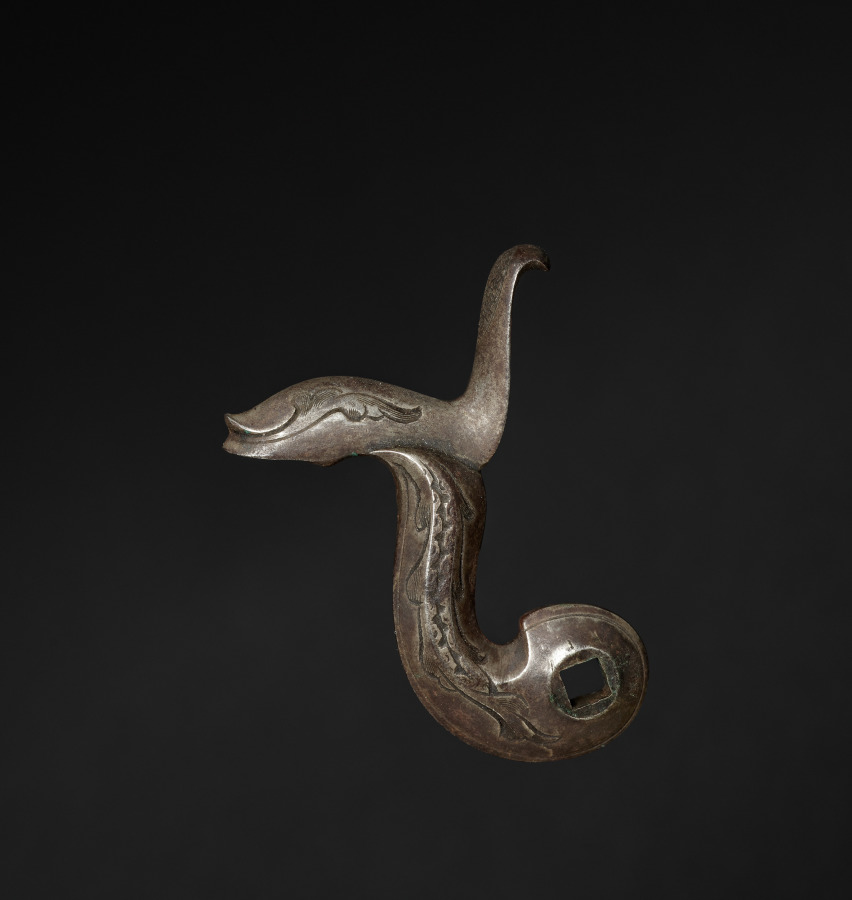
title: Gun-Lock Hammer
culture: England, early 19th century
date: c. 1800–1825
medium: steel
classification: Arms and Armor